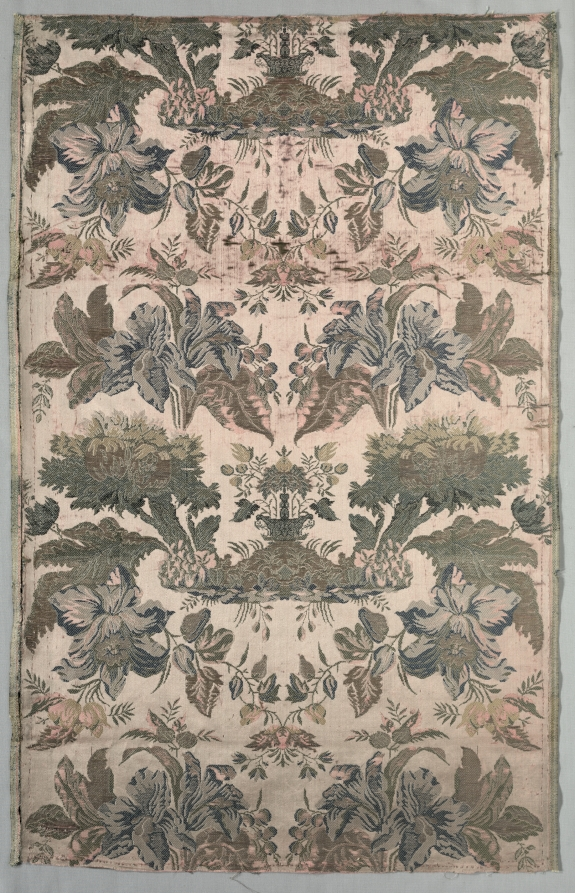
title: Length of Brocaded Silk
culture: Italy, 18th century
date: 1700s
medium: brocade; silk and metal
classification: Textile